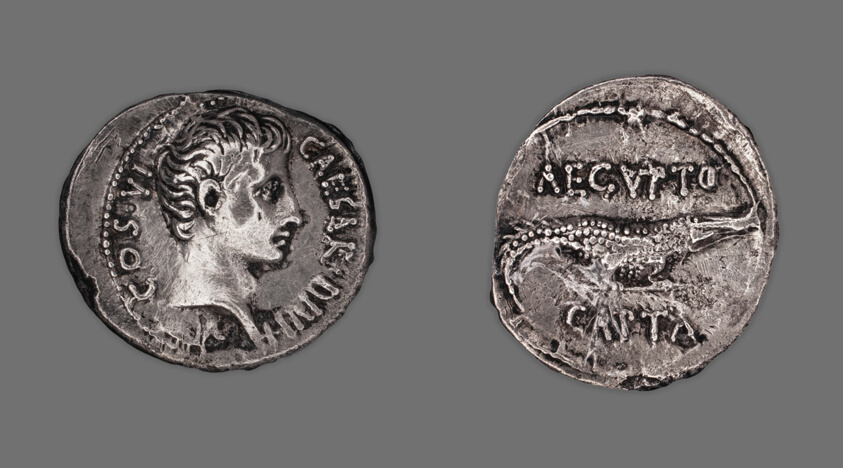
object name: Coin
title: Denarius (Coin) Portraying Octavian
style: imperial (roman), ancient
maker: Roman; minted in Pergamum or Ephesus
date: 28 BCE, issued by Octavian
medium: Silver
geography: Roman Empire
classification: coin; ancient art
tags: animals